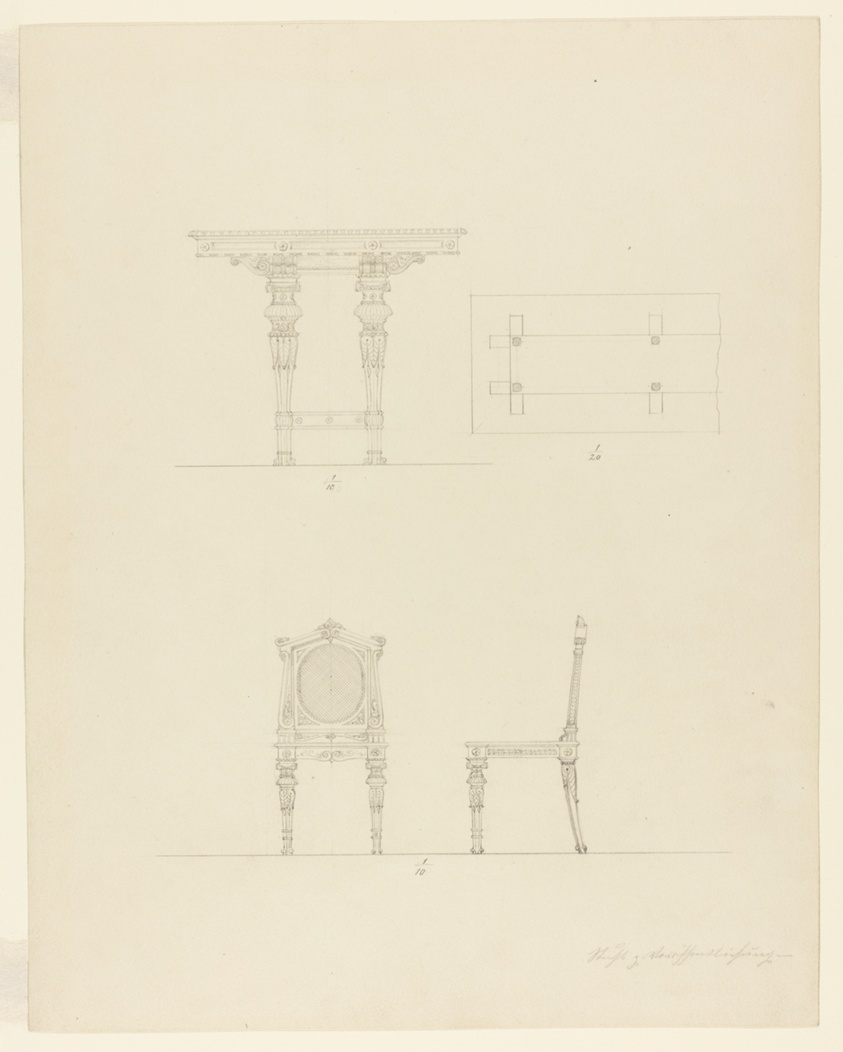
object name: Architectural Drawing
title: Design Projects, Table and Chair Elevations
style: 19th century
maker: Carl (Charles) J. Furst (American, born Germany 1840–1919)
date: c. 1860–1870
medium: Graphite on drawing paper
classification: industrial design; design; architectural drawing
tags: furniture, chairs, tables, design